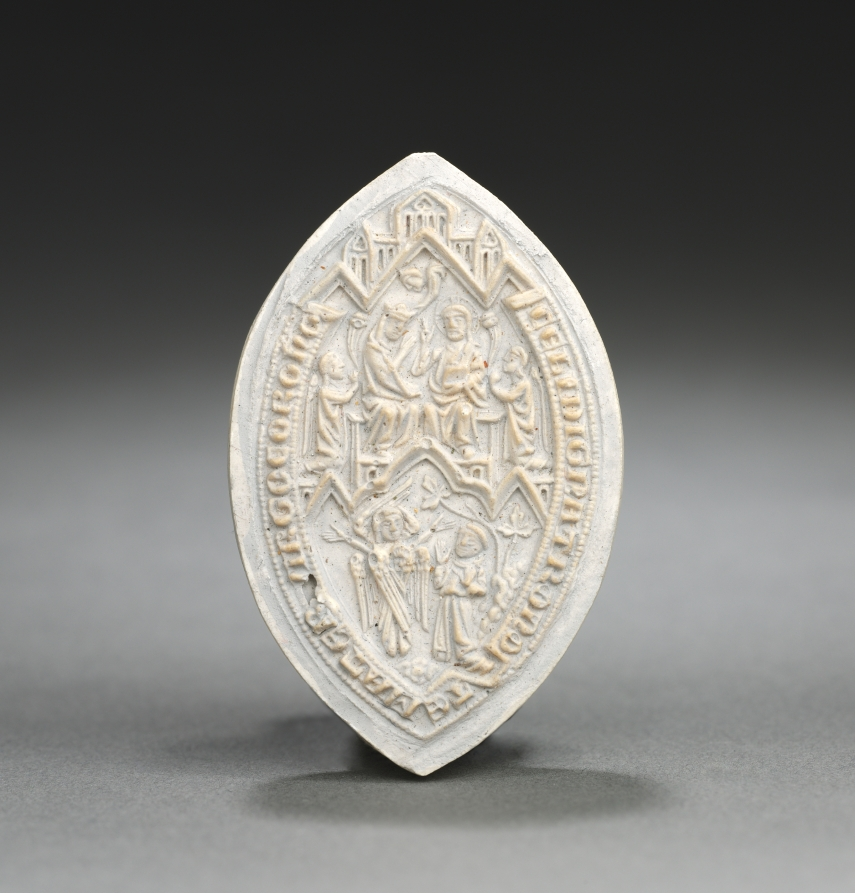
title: Almond-Shaped Seal: Coronation of the Virgin with a Kneeling Monk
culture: England or Germany, Gothic period, 14th century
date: 1300s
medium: gilded bronze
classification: Glyptic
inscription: CELI DIGNA TRONO TE MATER VIRGO CORONA.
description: These seals were once used in monasteries as molds for making wax impressions that were routinely pressed onto letters, charters, and other documents as proof of authenticity.